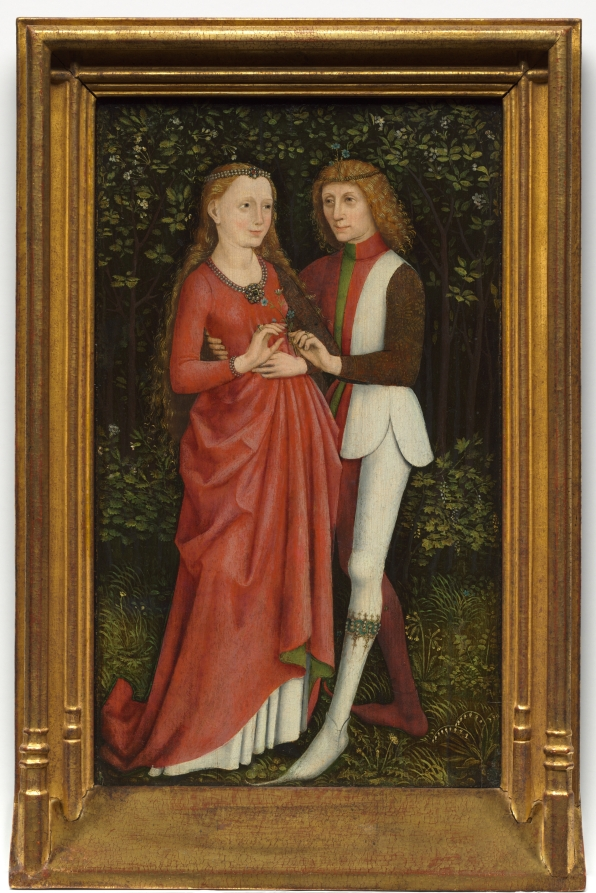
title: A Bridal Couple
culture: Southern Germany, 15th century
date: c. 1470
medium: oil on panel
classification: Painting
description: This painting depicting a recently married aristocratic couple is filled with symbolism. The various floral elements represent love and fertility, while the colors of their clothes suggest not only their relationship but also chastity, love, and modesty. What details might you choose to symbolize a young couple in love?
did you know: This painting inspired internationally renowned Finnish composer Kaija Saariaho to write a piece of music titled "Orion" after she visited the museum.